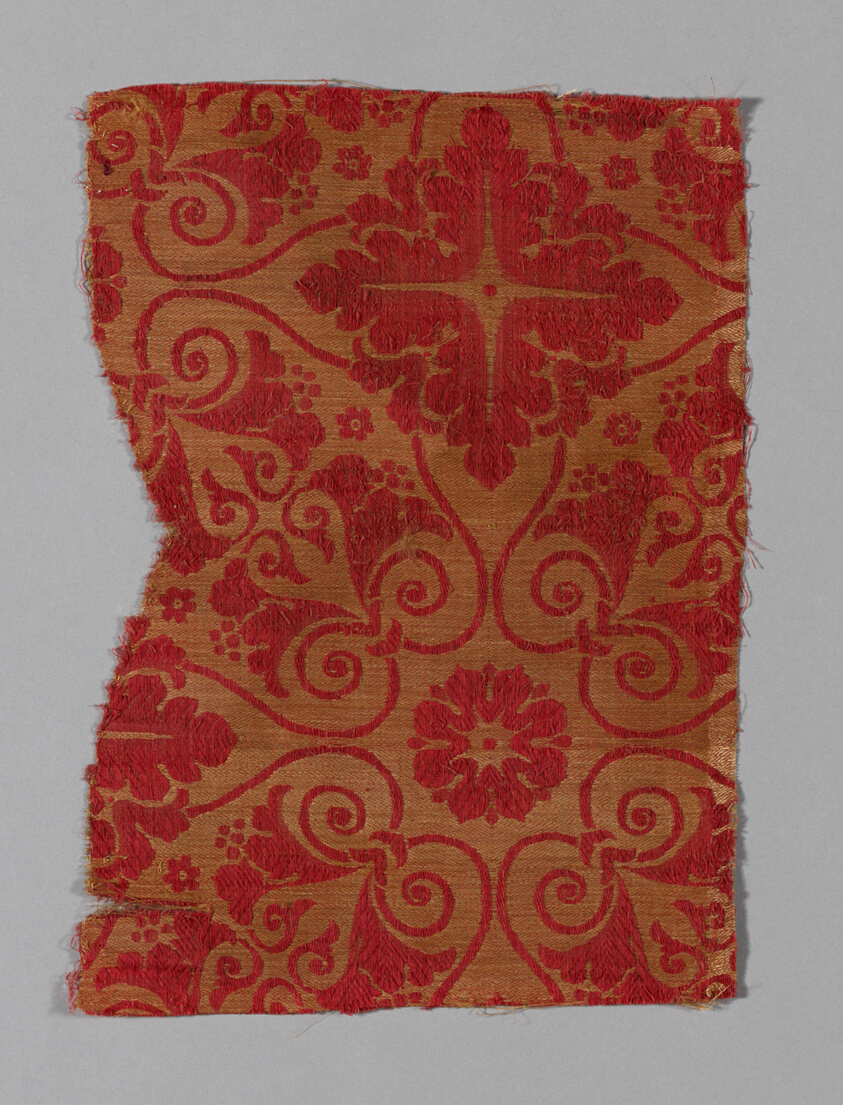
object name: Textile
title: Two Fragments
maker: Possibly Spain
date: 19th century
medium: Cotton and straw, satin weave self-patterned by areas of twill weaves and by reversing of faces; woven on loom with Jacquard attachment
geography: Spain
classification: textile; weaving